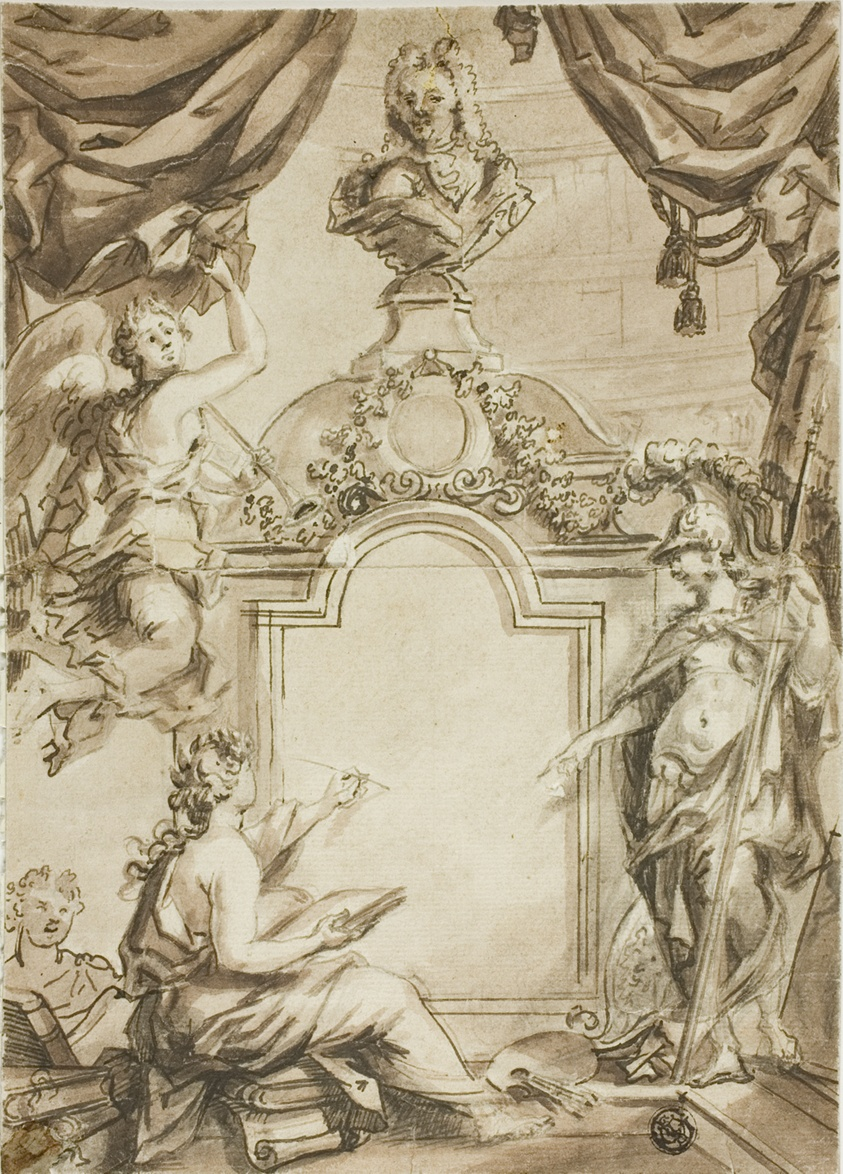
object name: Drawing and Watercolor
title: Design for Title page: Clio Taking Dictation from Minerva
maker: Gerard de Lairesse (Flemish, 1640-1711)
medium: Pen and brown ink, and brush and brown wash, over black chalk, on ivory laid paper, tipped onto ivory wove card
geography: Flanders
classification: pen and ink drawings; drawings (visual works); prints and drawing